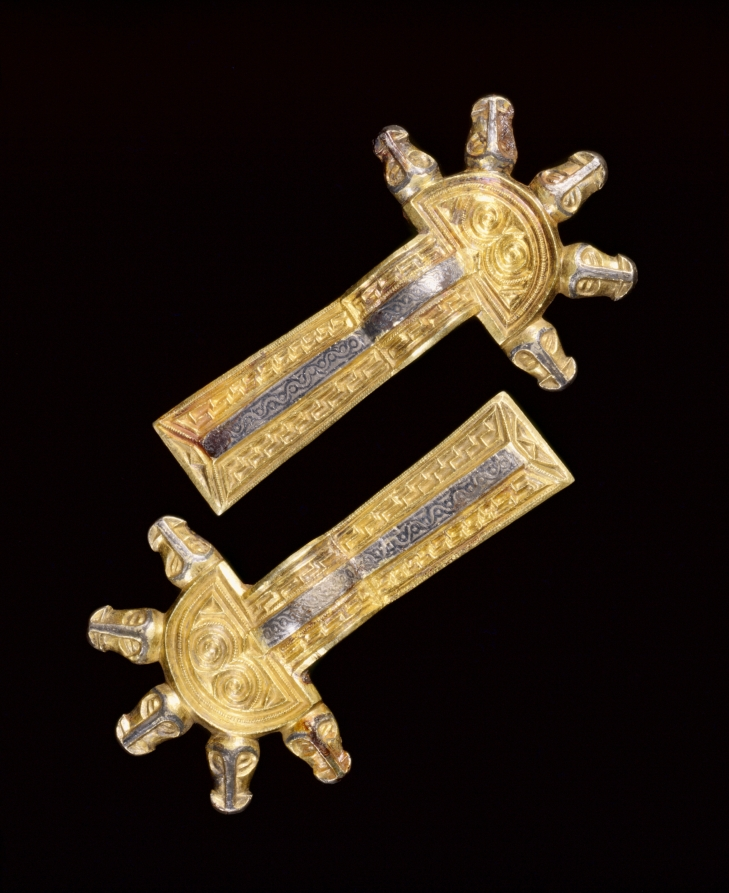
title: Pair of Fibulae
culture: Alemannic, Migration Period, 6th-7th century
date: 500s-600s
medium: cast silver, parcel-gilt, with niello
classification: Jewelry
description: A woman of high rank might have worn these twin fibulae on her shoulders, one fastening her inner garment on the right, the other her outer garment on the left. She might also have suspended them from her belt as decorative ornaments.